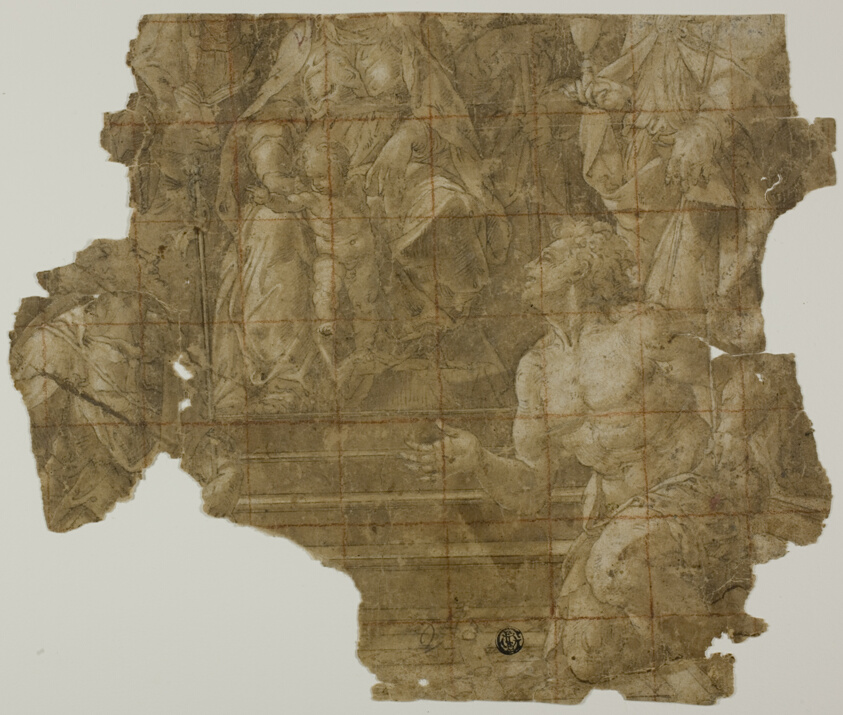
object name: Drawing and Watercolor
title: Virgin and Child with Saints (recto); Study of Arm (verso)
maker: Attributed to Bartomomeo Ramemghi, the elder; Italian, 1484-1542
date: 1560/80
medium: Pen and brown ink and brush and brown wash heightened with lead white (partially oxidixed) (recto), and black chalk (verso), on tan laid paper, squared in red chalk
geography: Italy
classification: pen and ink drawings; drawings (visual works); prints and drawing